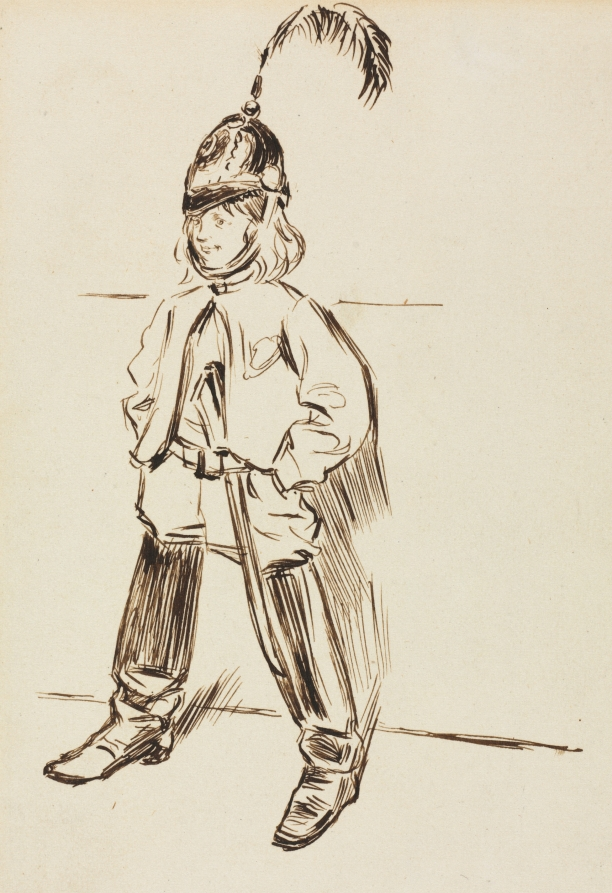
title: Study of a Child in Helmet and Boots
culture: England, 19th century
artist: Charles Samuel Keene (British, 1823–1891)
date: c. 1842–91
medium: pen and ink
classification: Drawing